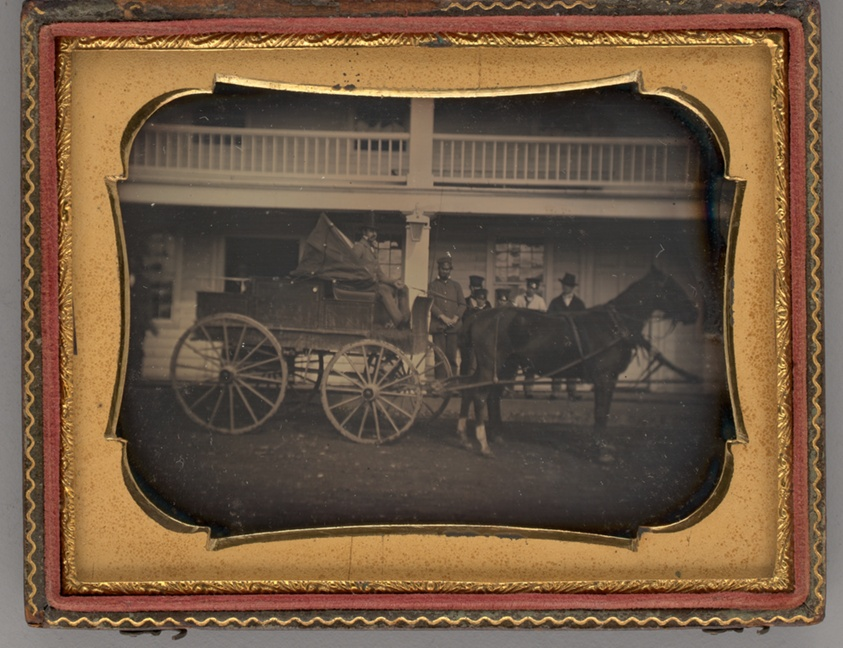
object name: Photograph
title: Untitled (Horse-Drawn Carriage)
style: 19th century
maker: Unknown maker; American, 19th century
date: 1852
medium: Daguerreotype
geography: United States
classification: portrait; daguerreotype; portrait; photograph; photographic process; photography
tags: lundberg collection, hats, horse-drawn carriage, horses, Male, people